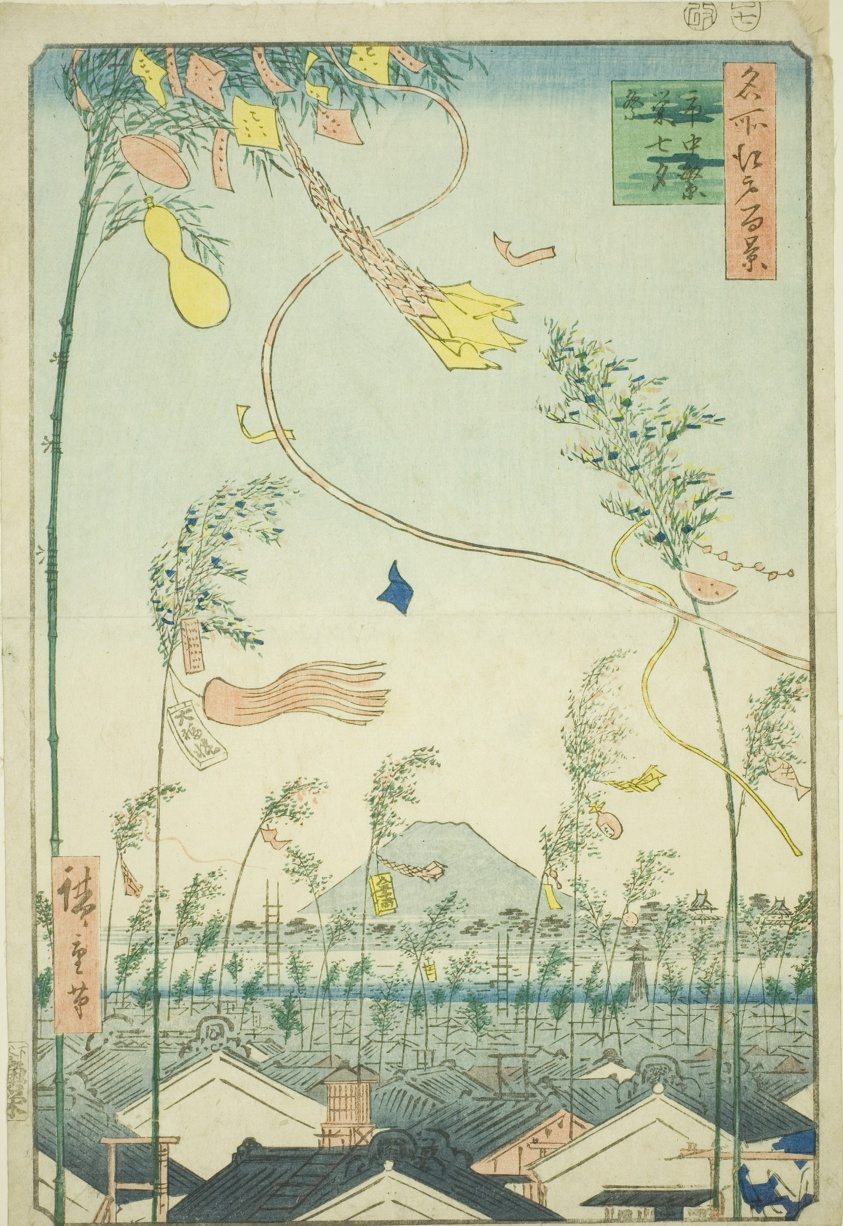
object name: Print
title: The City Flourishing, Tanabata Festival (Shichu han'ei Tanabata Matsuri), from the series “One Hundred Famous Views of Edo (Meisho Edo hyakkei)”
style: Japanese (culture or style)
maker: Utagawa Hiroshige 歌川 広重; Japanese, 1797-1858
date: 1857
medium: Color woodblock print; oban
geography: Japan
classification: woodblock print; print; asian art